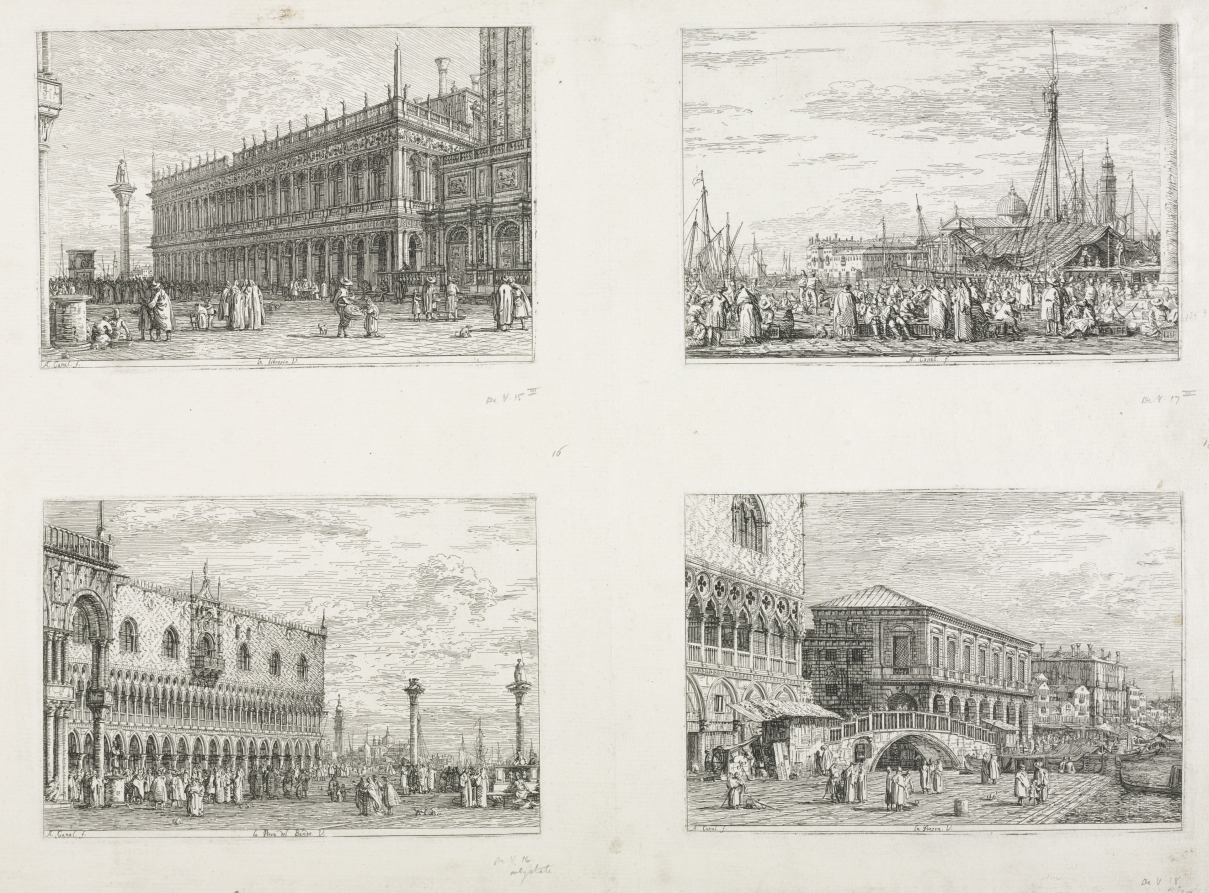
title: Views: The Prison, Venice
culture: Italy, Venice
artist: Antonio Canaletto (Italian, 1697–1768)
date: 1735–1746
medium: etching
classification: Print